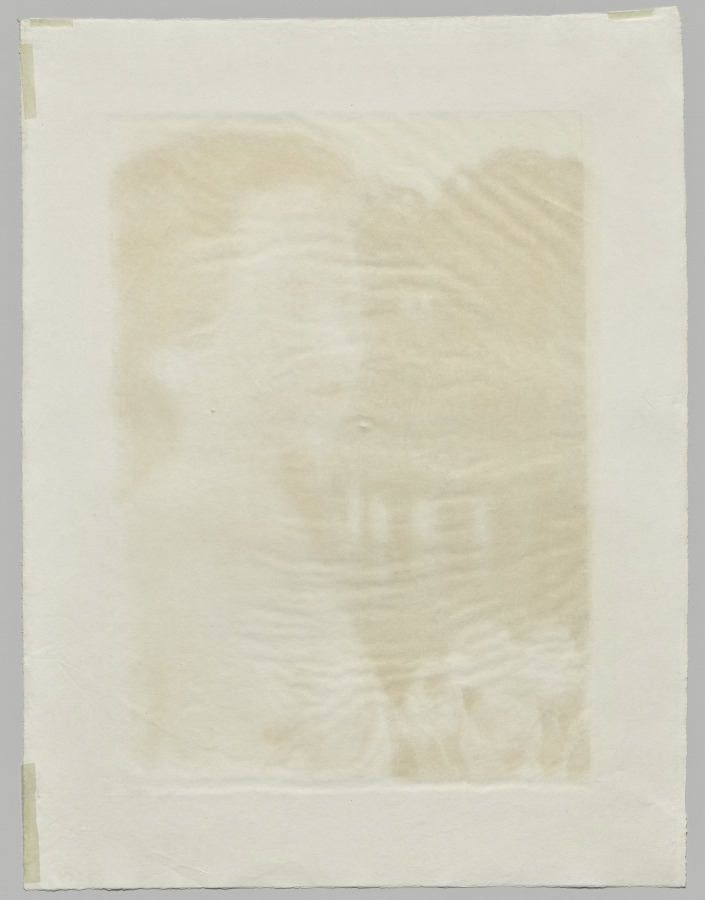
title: She Was More Beautiful Than Dreams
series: Love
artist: Maurice Denis (French, 1870–1943)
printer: August Clot (French, 1858–1936)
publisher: Ambroise Vollard (French, 1867–1939)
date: 1899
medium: color lithograph on wove paper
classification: Print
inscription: Recto, lower left: “Elle était plus belle que les rèves”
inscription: In graphite, recto, lower right: “Maurice Denis (signed)”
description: Maurice Denis belonged to the Nabis, a group of artists who came together in 1889 to pursue a radical new style informed by subjective experience and emotion. This print is from a series in which Denis explored his devotion to his wife, Marthe, by depicting her in a variety of settings alongside titles drawn from his own journal. The vague but evocative images were meant to encourage the viewer to draw connections to the theme and meditate on its meaning.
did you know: Maurice Denis was a devout Catholic and often drew visual connections between his wife, Marthe, the subject of this print series, and the Virgin Mary.